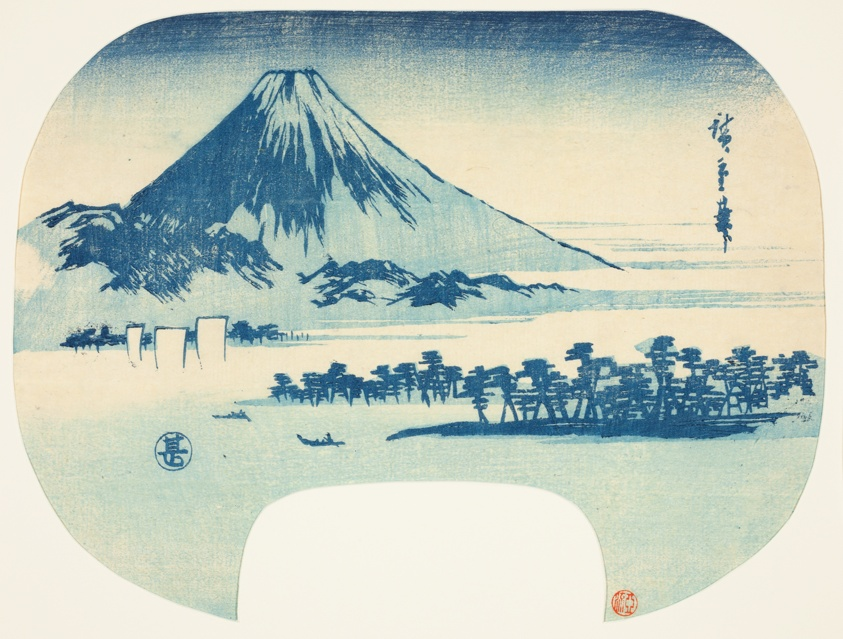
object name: Print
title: Mount Fuji Rising beyond Miho Beach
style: Japanese (culture or style)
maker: Utagawa Hiroshige 歌川 広重; Japanese, 1797-1858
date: c. 1838/42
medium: Color woodblock print; uchiwa-e, aizuri-e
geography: Japan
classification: woodblock print; print; asian art